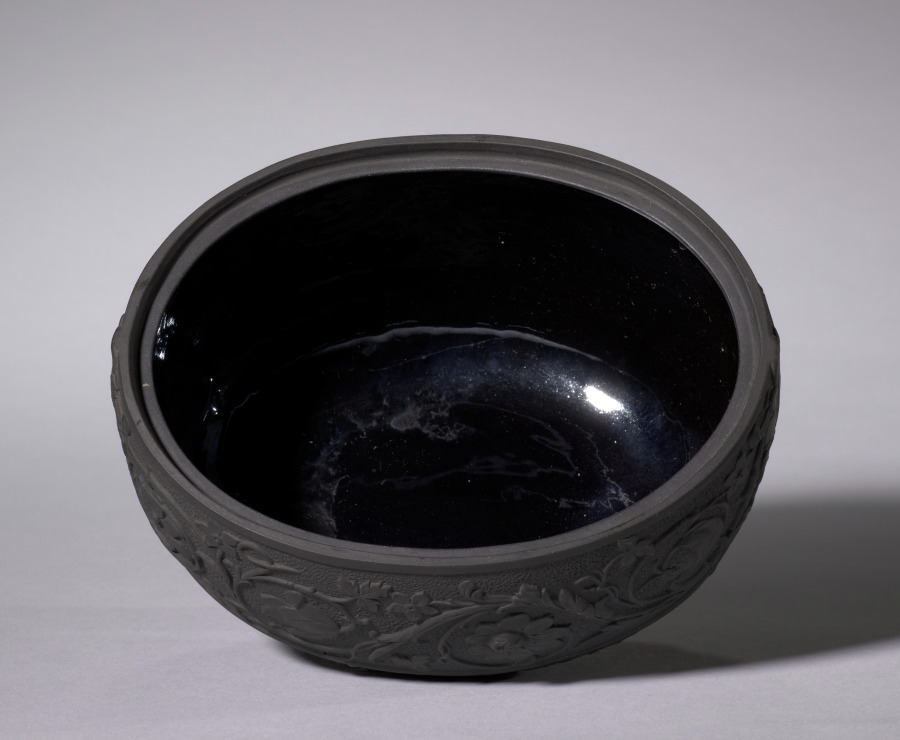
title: Teapot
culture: England, 19th century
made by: Elijah Mayer (British, c. 1770–1805)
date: c. 1810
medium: black basalt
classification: Ceramic